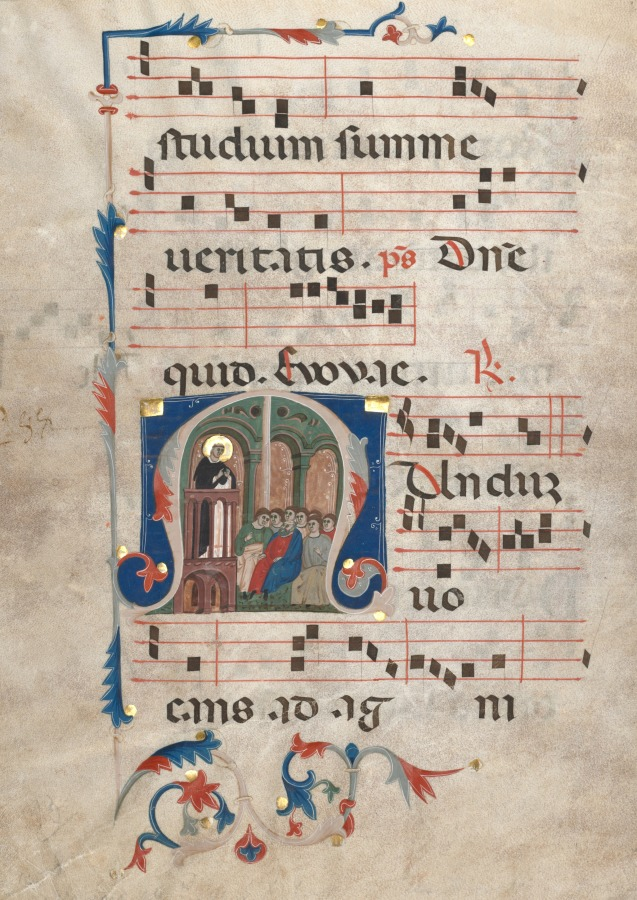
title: Bifolium from an Antiphonary: Initial M with Saint Dominic Preaching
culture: Italy, Bologna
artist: Primo Miniatore di San Domenico (Italian)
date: c. 1320–40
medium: ink, tempera, and gold on parchment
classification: Manuscript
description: The representation of Saint Dominic (1170–1221), founder of the Dominican Order of Preachers, in this initial suggests that this double page was at one time part of a manuscript made for a Dominican convent. Saint Dominic traveled much, preaching throughout Europe, and was particularly venerated in Bologna, the city in which he died and was buried. The illuminator of this initial is named after a volume he decorated of Seneca’s works (now in the Bibliothèque nationale in Paris). His workshop specialized in large-scale manuscripts destined for wealthy religious institutions in the region of Emilia, for which Bologna was the artistic and intellectual center.